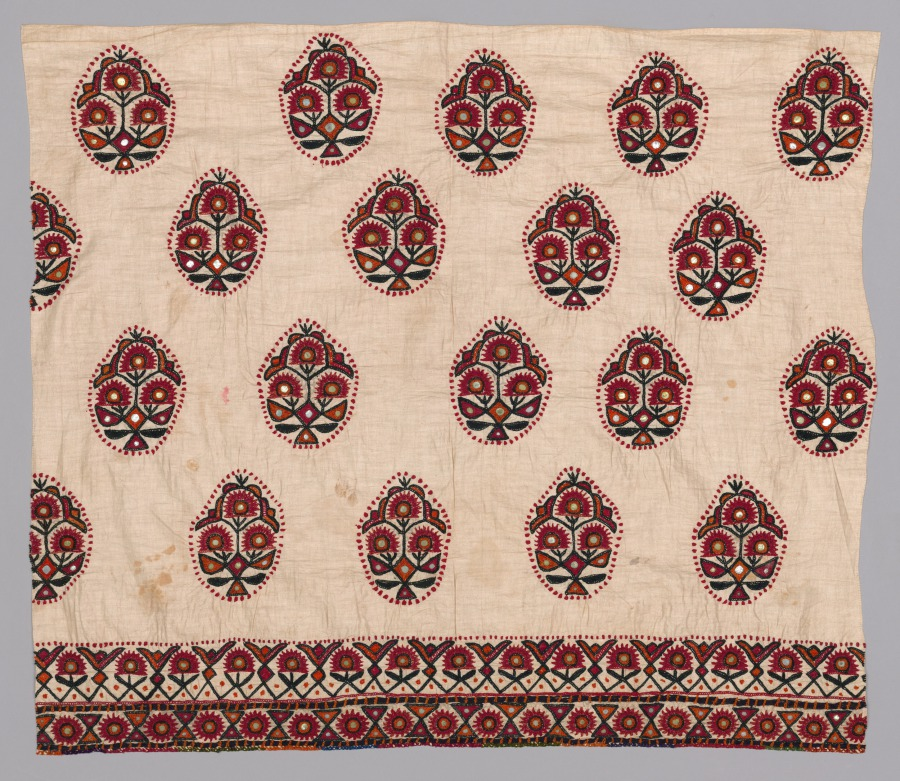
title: Skirt Panel (?)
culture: Western India, Gujarat, Kachchh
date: early 1900s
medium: silk on cotton tabby ground, embroidery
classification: Embroidery